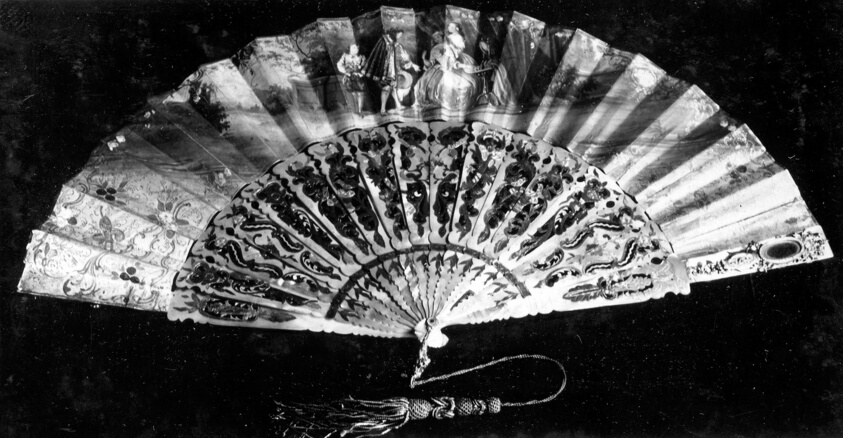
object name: Costume and Accessories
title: Fan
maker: France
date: 1825/75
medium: Carved and gilded pearl sticks and guards; painted paper mount; gilt ornaments on guard; pearl rivet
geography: France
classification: textile; fan - paper; costume accessory - folding fan; costume